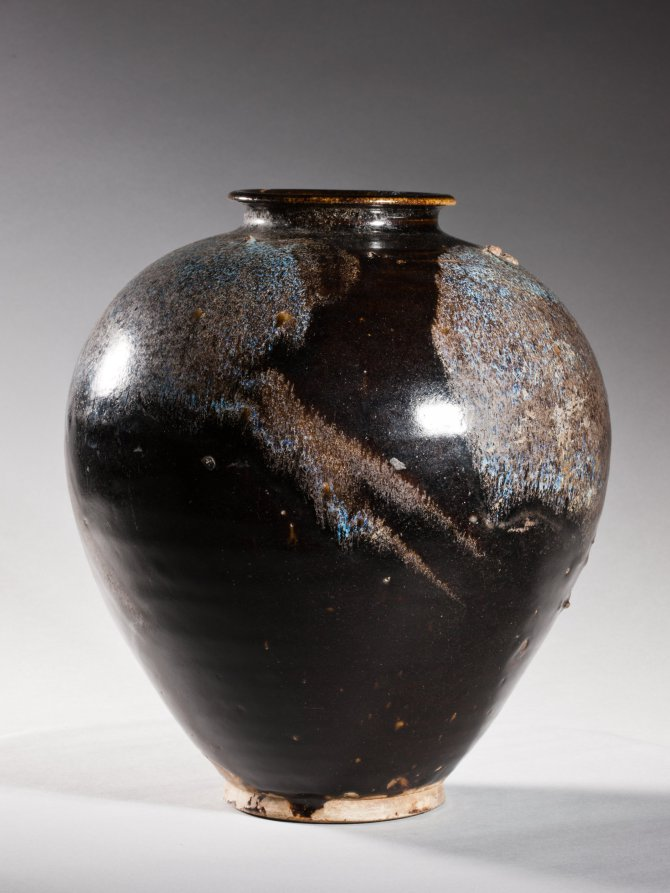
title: Jar: Black Ware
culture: China, Henan province, Huangdao kilns, Tang dynasty (618-907)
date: 700s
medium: glazed stoneware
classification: Ceramic